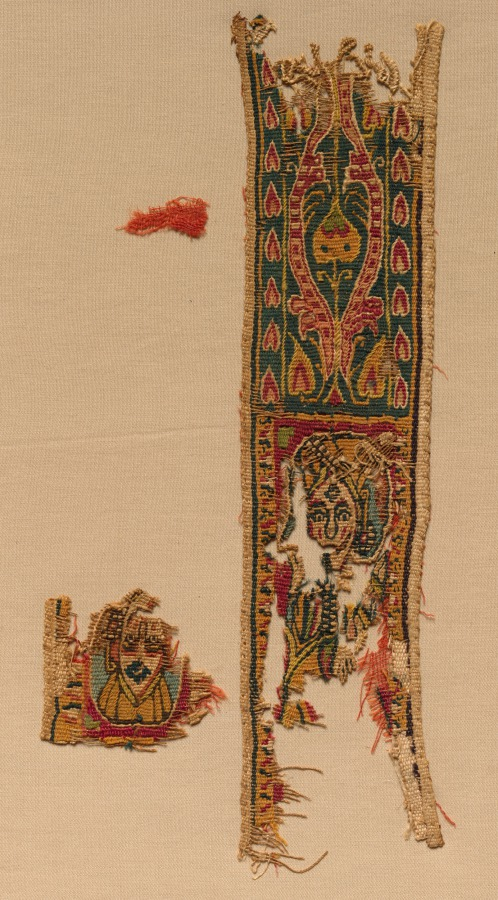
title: Fragment of a Clavus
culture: Egypt, Abbasid period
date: 700s - 800s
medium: tapestry inwoven in tabby ground; linen and wool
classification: Textile